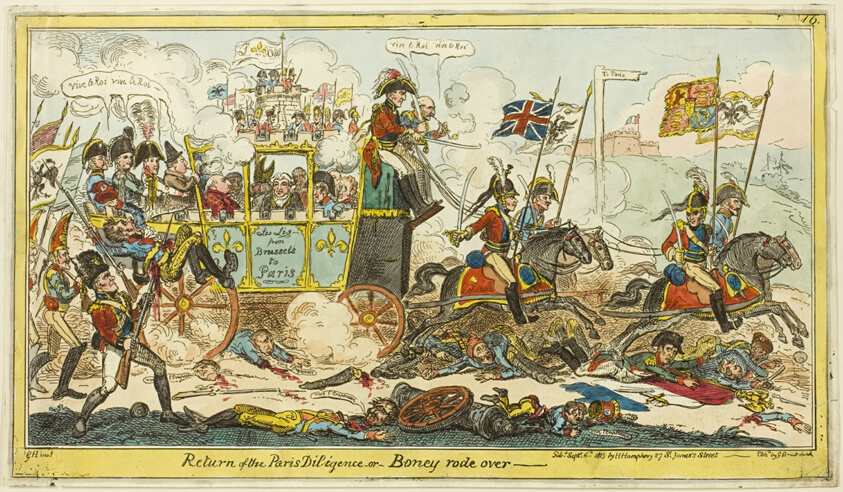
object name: Print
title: Return of the Paris Diligence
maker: George Cruikshank (English, 1792-1878); after George Humphrey (English, 1773-1831); published by Hannah Humphrey (English, c. 1745-1818)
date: published September 6, 1815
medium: 1815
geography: England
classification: etching; print; prints and drawing